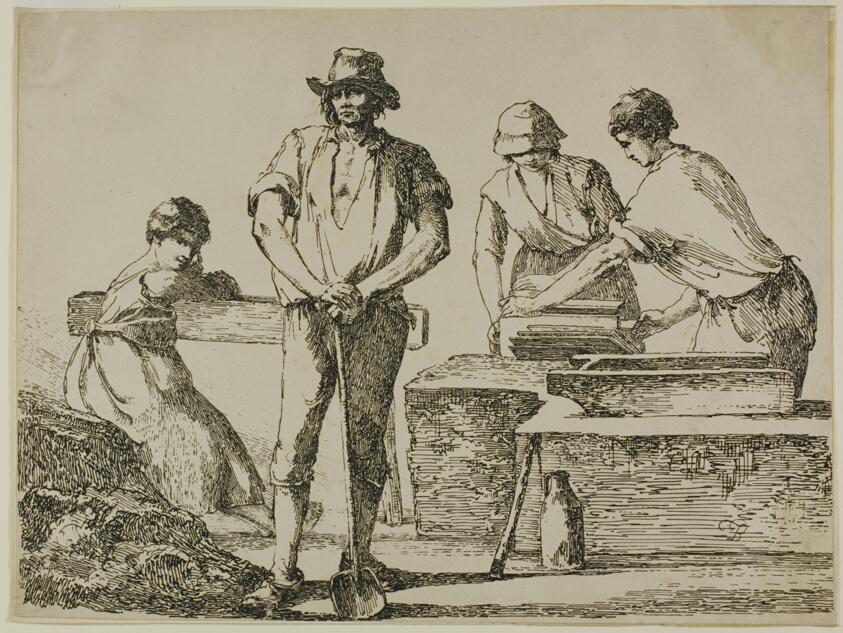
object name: Print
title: Tilemakers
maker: Thomas Barker (English, 1769-1847); published by G. J. Vollweiler (German, c. 1801-1900)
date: 1803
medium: Polyautograph on paper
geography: England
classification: lithograph; print; prints and drawing